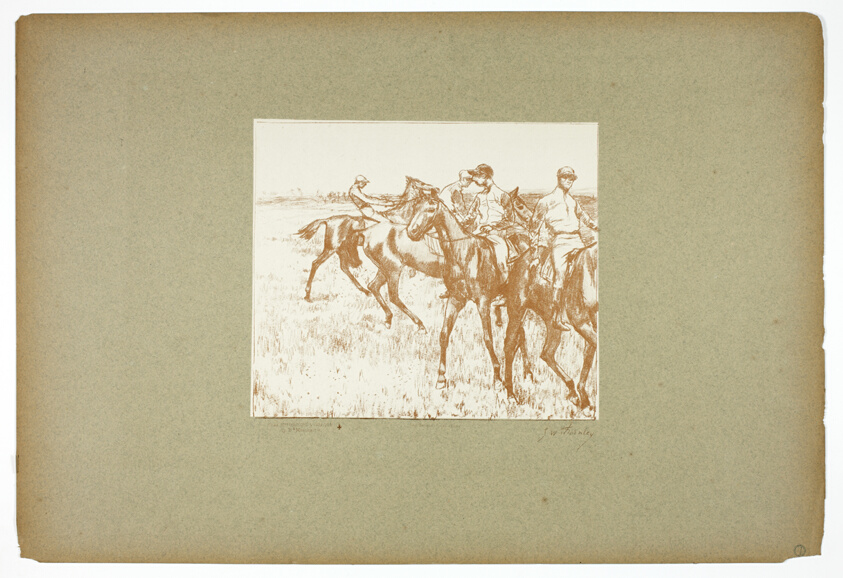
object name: Print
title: The Jockeys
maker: Georges-William Thornley (French, 1857-1935); after Edgar Degas (French, 1834-1917); printed by Atelier Becquet (French, 19th century); published by Boussod, Valadon, & Company (French, 18th-19th century)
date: 1889–90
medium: Lithograph on paper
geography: France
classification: lithograph; print; prints and drawing